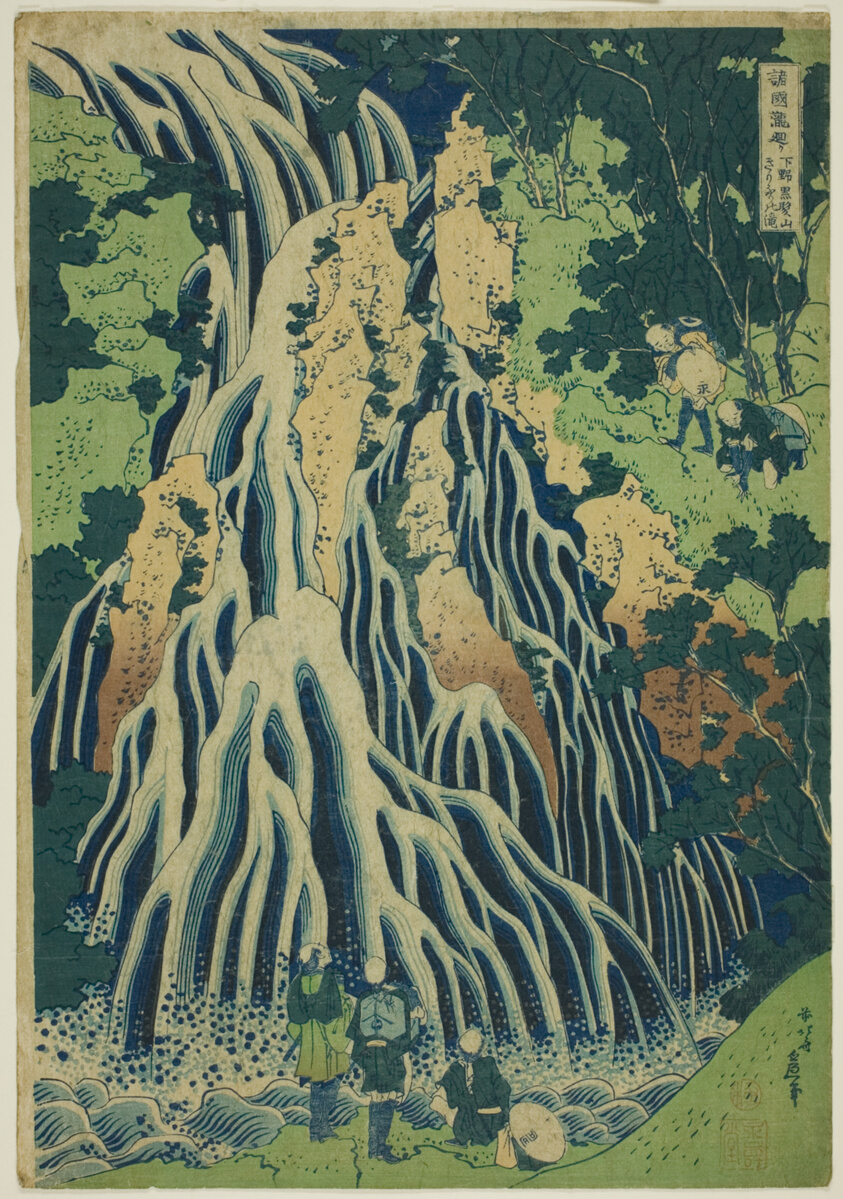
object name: Print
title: Kirifuri Falls at Mount Kurokami in Shimotsuke Province (Shimotsuke Kurokamiyama Kirifuri no taki), from the series "A Tour of Waterfalls in Various Provinces (Shokoku taki meguri)"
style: Japanese (culture or style)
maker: Katsushika Hokusai 葛飾 北斎; Japanese, 1760-1849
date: c. 1833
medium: Color woodblock print; oban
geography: Japan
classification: woodblock print; print; asian art